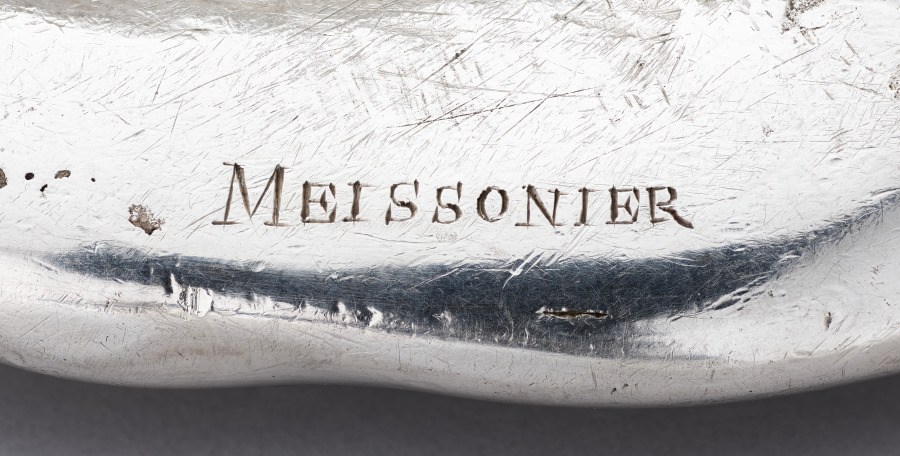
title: Tureen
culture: France, Paris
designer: Juste-Aurèle Meissonnier (French, 1695–1750)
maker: Pierre-François Bonnestrenne (French)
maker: Henry Adnet (French, 1745)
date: 1735–38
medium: silver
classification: Silver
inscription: engraved Meissonnier signature.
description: See entry for cover record 1977.182.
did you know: The langoustine, pigeon, and vegetables were cast using real examples giving the silver copies lifelike detail and appearance.